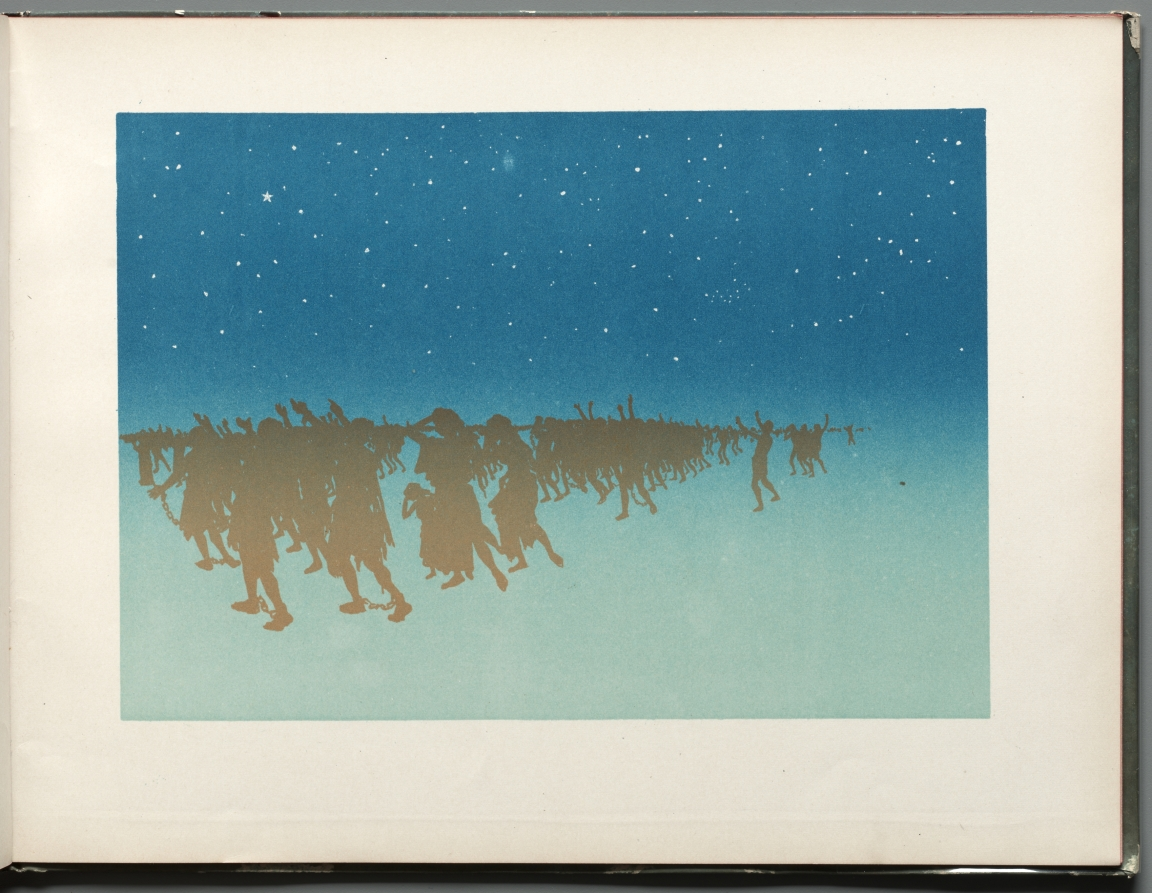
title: The Progress of the Stars: Les Esclaves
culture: France, 19th century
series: Bound Volume illustrating the poetry and music of Georges Fragerolle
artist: Henri Rivière (French, 1864–1951)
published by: C. Marpon & Flammarion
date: 1890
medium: 18 color lithographs in a Bound Volume illustrating the poetry and music of Georges Fragerolle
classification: Bound Volume